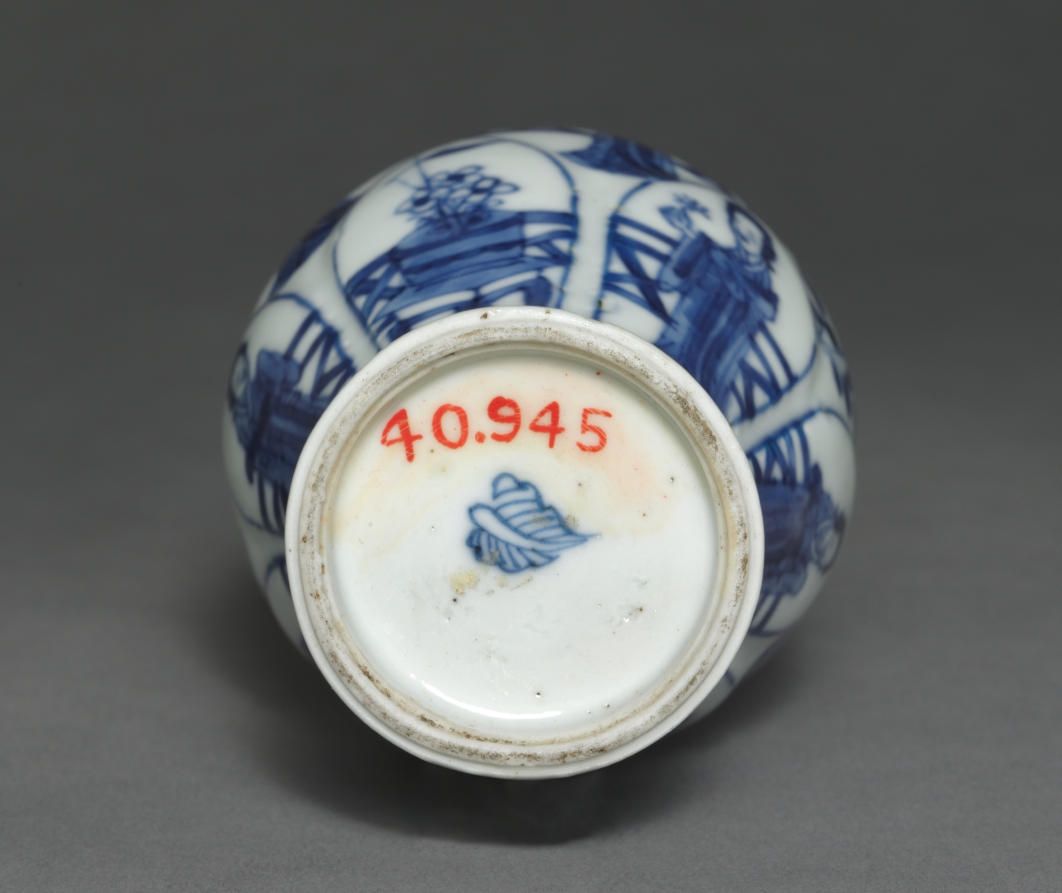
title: Vase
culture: China, Qing dynasty (1644-1911)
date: 19th Century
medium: porcelain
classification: Ceramic